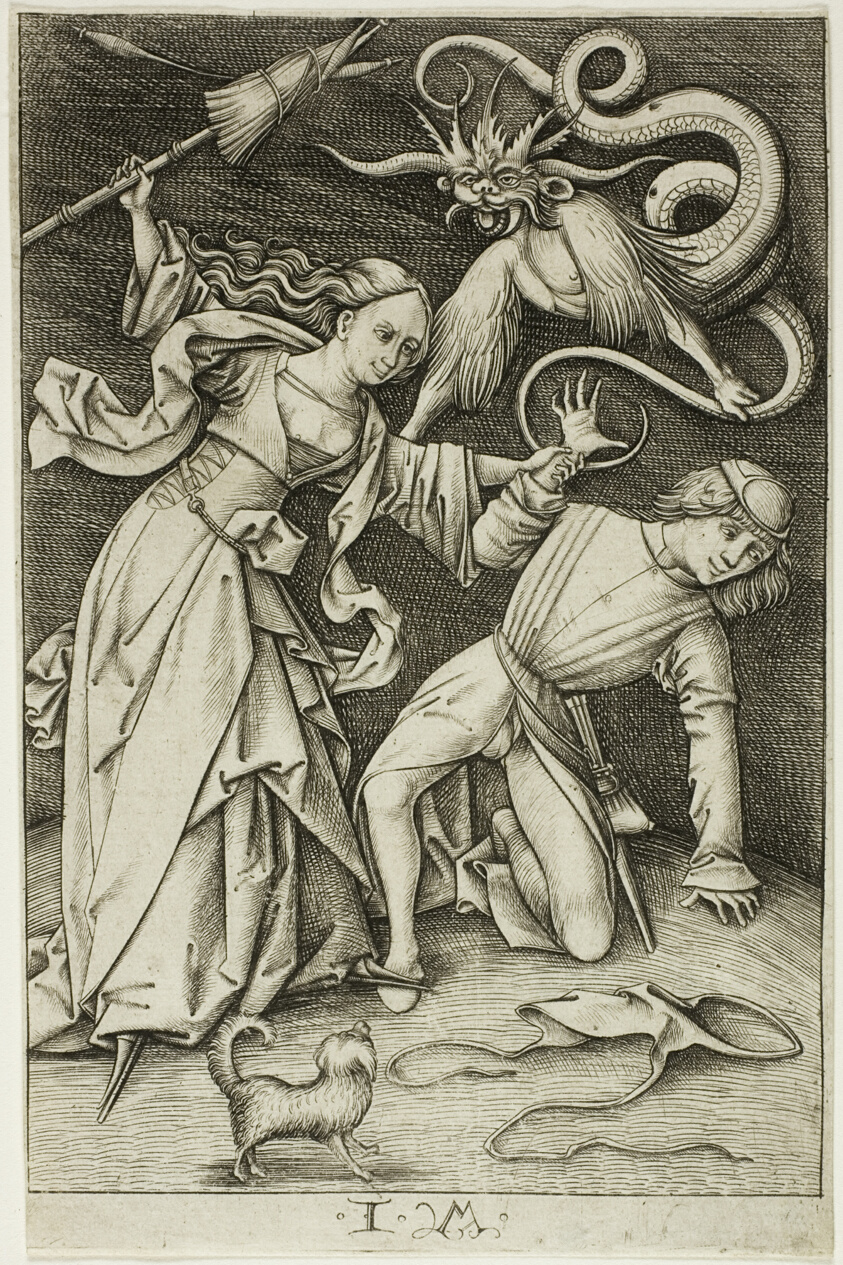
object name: Print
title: The Fight over the Trousers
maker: Israhel van Meckenem the Younger; German, c. 1440/45-1503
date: c. 1495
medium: Engraving printed in black on ivory laid paper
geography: Germany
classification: engraving; print; prints and drawing